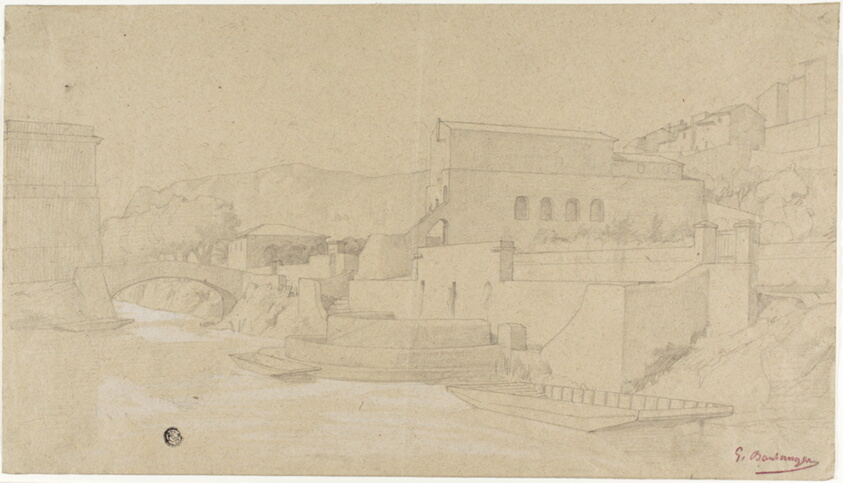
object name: Drawing and Watercolor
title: Italian Town on a River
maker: Gustave Clarence Rodolphe Boulanger (French, 1824-1888)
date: 1850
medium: Graphite, heightened with white gouache, on tan wove paper with brown fibers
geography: France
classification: graphite; drawings (visual works); prints and drawing